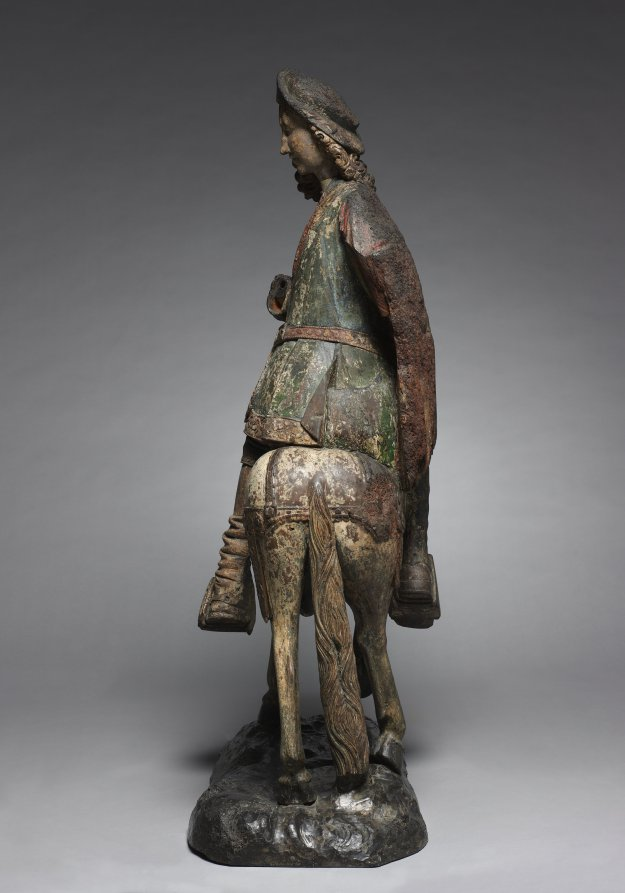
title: Saint Martin of Tours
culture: Northeast France or Flanders, 15th century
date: c. 1480–1500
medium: polychromed walnut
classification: Sculpture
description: According to tradition, Saint Martin was born during the reign of Constantine the Great (306–37 CE) and served as a member of the Roman cavalry in Gaul. There he earned a reputation for humility and boundless charity. During the severe winter of 322 CE at Amiens, Martin's compassion for others led him to divide his cloak with his sword, and to give half to a poor, naked beggar. This event, along with Martin's subsequent vision of the beggar as Christ, eventually led to the saint's widespread popularity throughout medieval Europe. Saint Martin was particularly venerated in the city of Tours where he served as bishop, where his tomb is located, and of which he remains the patron saint.